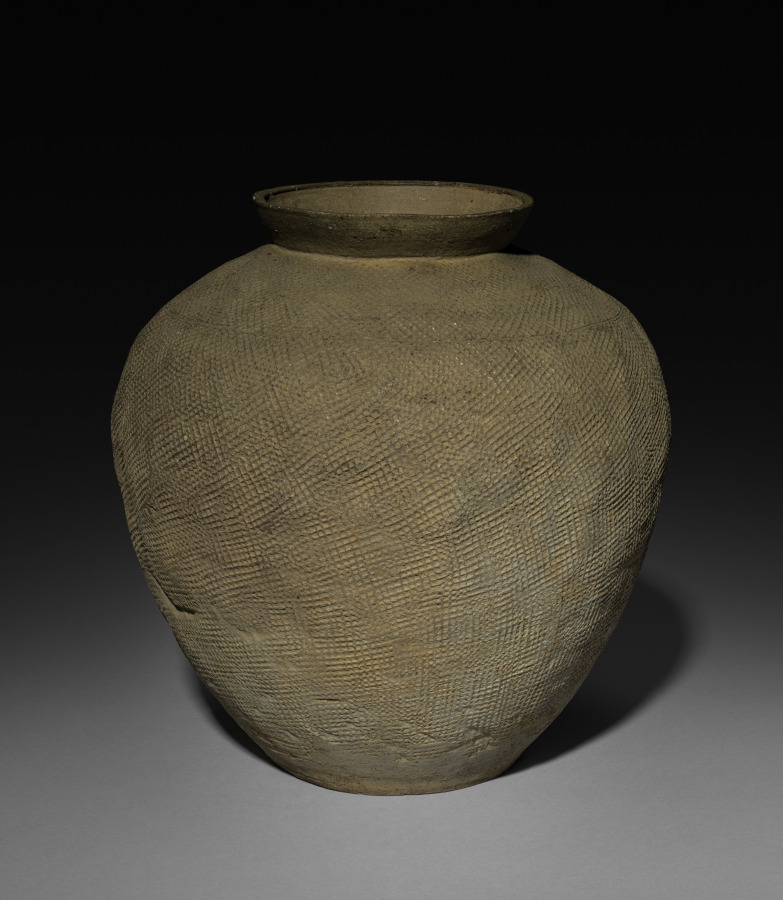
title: Jar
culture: China, Hunan province, reportedly Changsha, Eastern Zhou dynasty (770–256 BCE), Warring States period (475–221 BCE)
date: 481–221 BCE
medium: earthenware with stamped decoration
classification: Ceramic